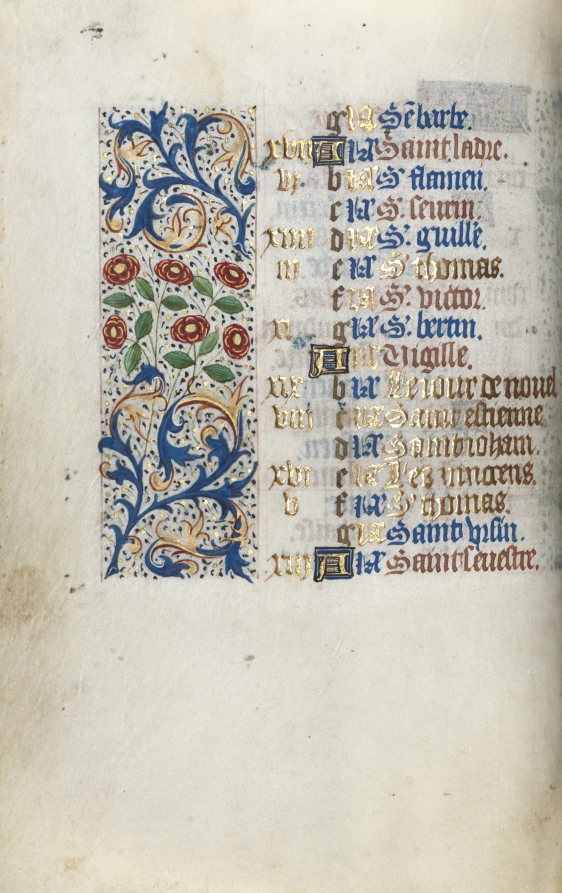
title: Book of Hours (Use of Rouen): fol. 12v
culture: France, Rouen, 15th century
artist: Master of the Geneva Latini (French, active Rouen, 1460–80)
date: c. 1470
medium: ink, tempera, and gold on vellum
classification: Bound Volume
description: In the late 1400s and early 1500s Rouen was an established and important center of book production. The city’s cathedral had a wealthy chapter that spent large sums of money to commission books and to maintain its extensive library. The stationers and booksellers would have likely been concentrated in or near the cathedral precinct. This artist, named after a manuscript now in Geneva, was Rouen’s principal illuminator during the second half of the 1400s.